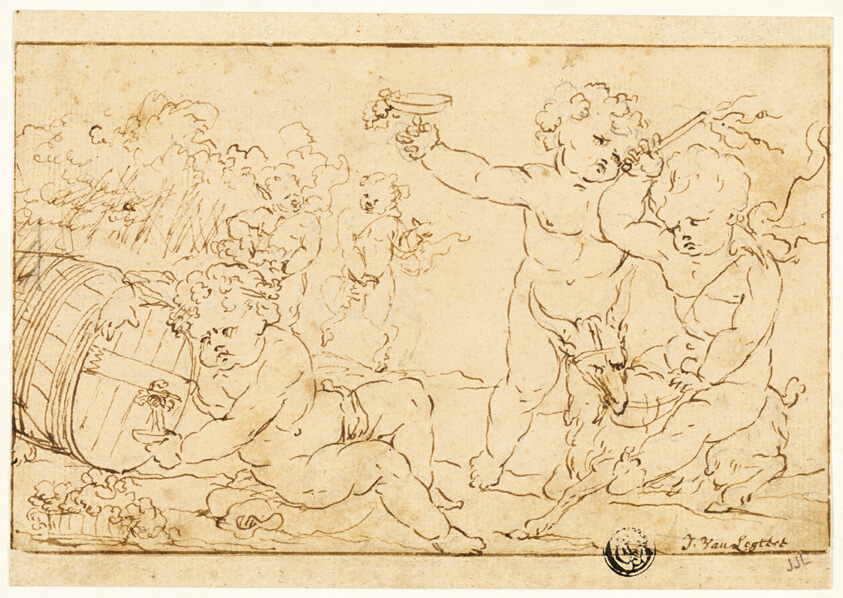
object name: Drawing and Watercolor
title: Young Bacchus and Companions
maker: Possibly after Ignatius van Logteren; Dutch, 1685-1732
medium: Pen and brown ink over graphite, on buff laid paper, laid down on board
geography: Holland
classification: pen and ink drawings; drawings (visual works); prints and drawing